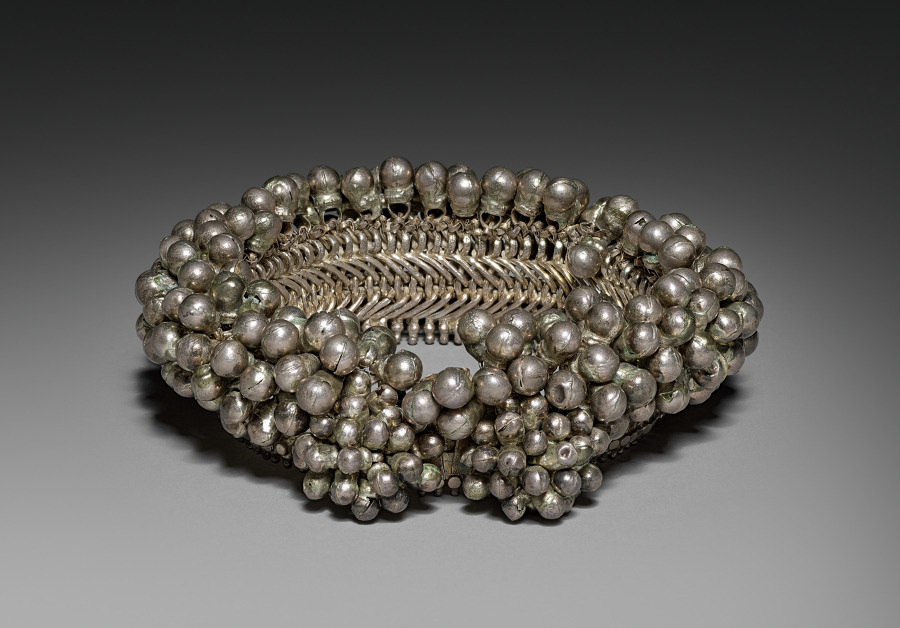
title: Anklet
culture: India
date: 1800s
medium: silver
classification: Jewelry